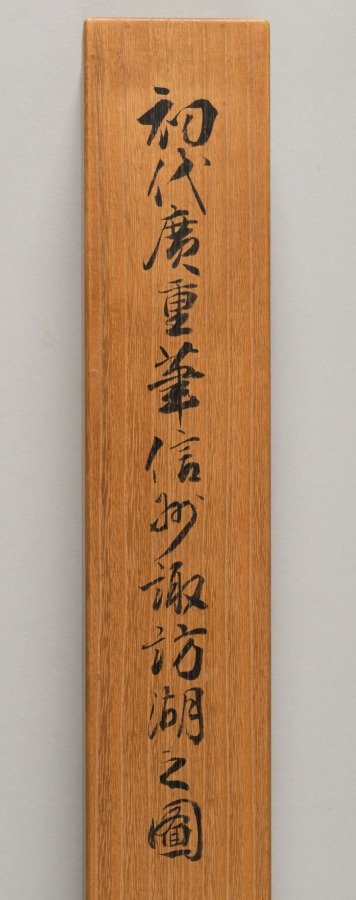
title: Lake Suwa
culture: Japan, Edo period (1615–1868)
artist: Utagawa Hiroshige (Japanese, 1797–1858)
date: c. 1832–58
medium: hanging scroll; ink and color on silk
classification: Painting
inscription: 立斎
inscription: 廣重